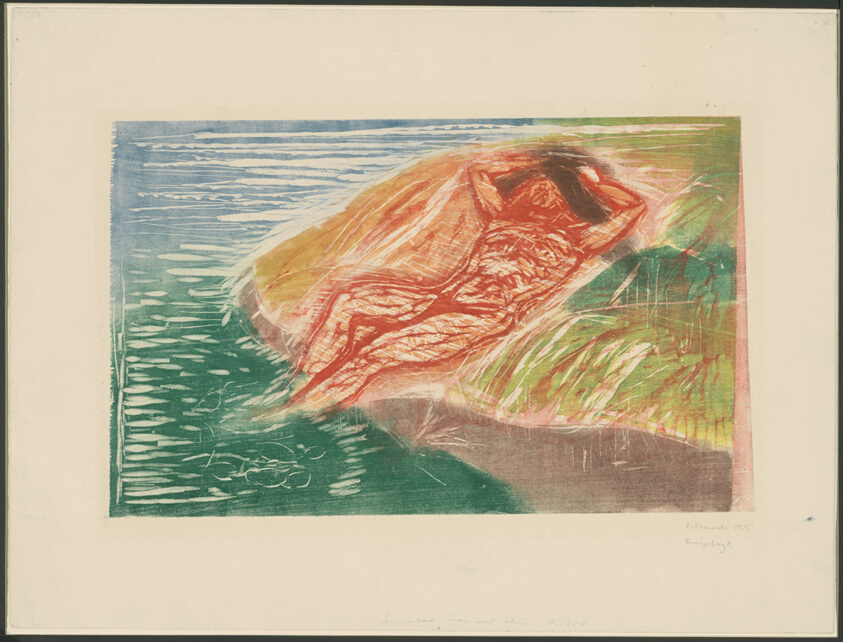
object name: Print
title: Sunbathing I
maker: Edvard Munch (Norwegian, 1863-1944)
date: 1915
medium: Woodcut printed from two blocks in pink, orange, red, yellow, yellowish-green, blue, green, and brown ink on heavyweight cream wove paper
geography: Norway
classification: woodcut; print; prints and drawing